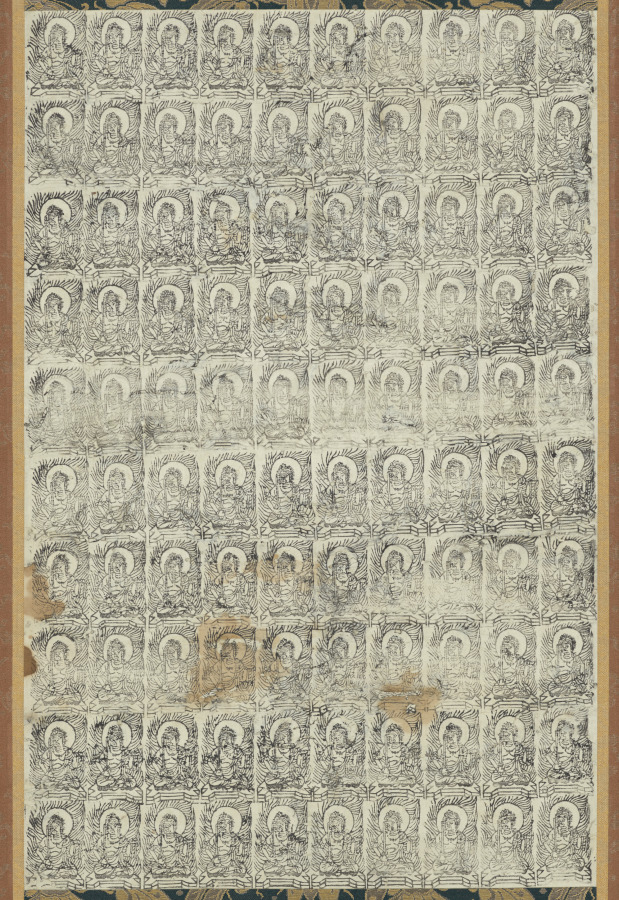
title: One Hundred Images of Fudo (Acala)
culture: Japan, Kamakura period (1185–1333)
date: 1200s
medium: Woodblock print mounted as a hanging scroll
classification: Print